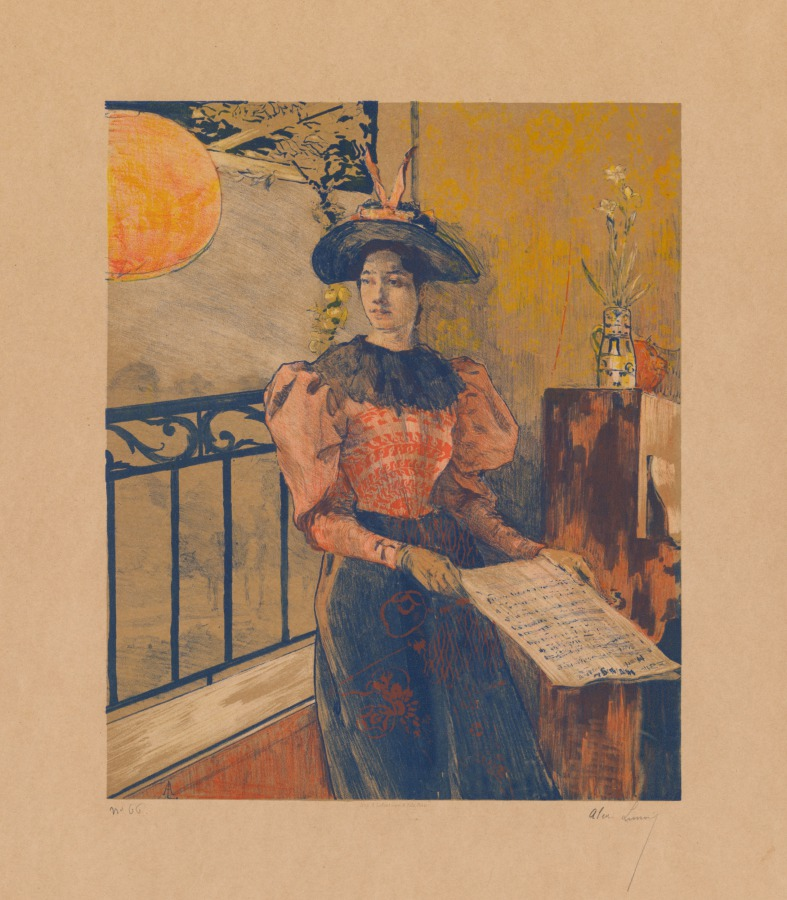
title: L’Illumination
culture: France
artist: Alexandre Lunois (French, 1863–1916)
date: 1893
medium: color lithograph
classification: Print